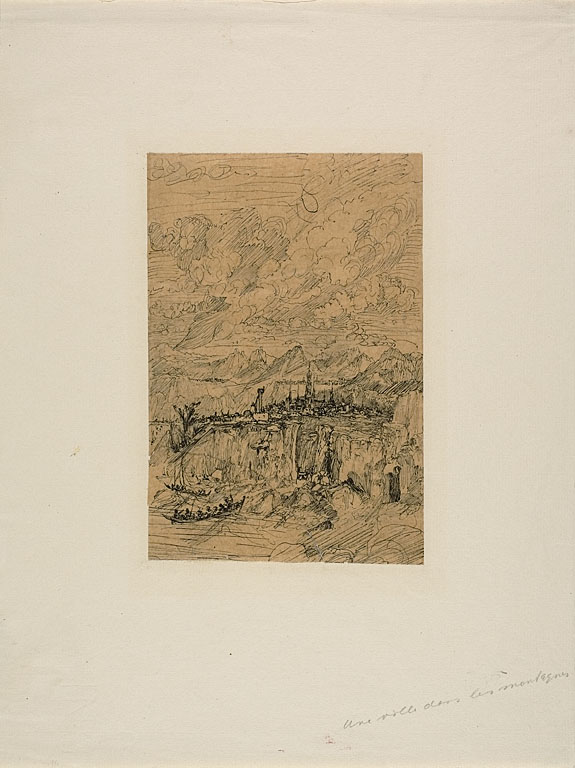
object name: Drawing and Watercolor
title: City in the Mountains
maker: Rodolphe Bresdin (French, 1825-1885)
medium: Pen and black ink, on tan tracing paper, laid down on ivory laid paper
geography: France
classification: pen and ink drawings; drawings (visual works); prints and drawing